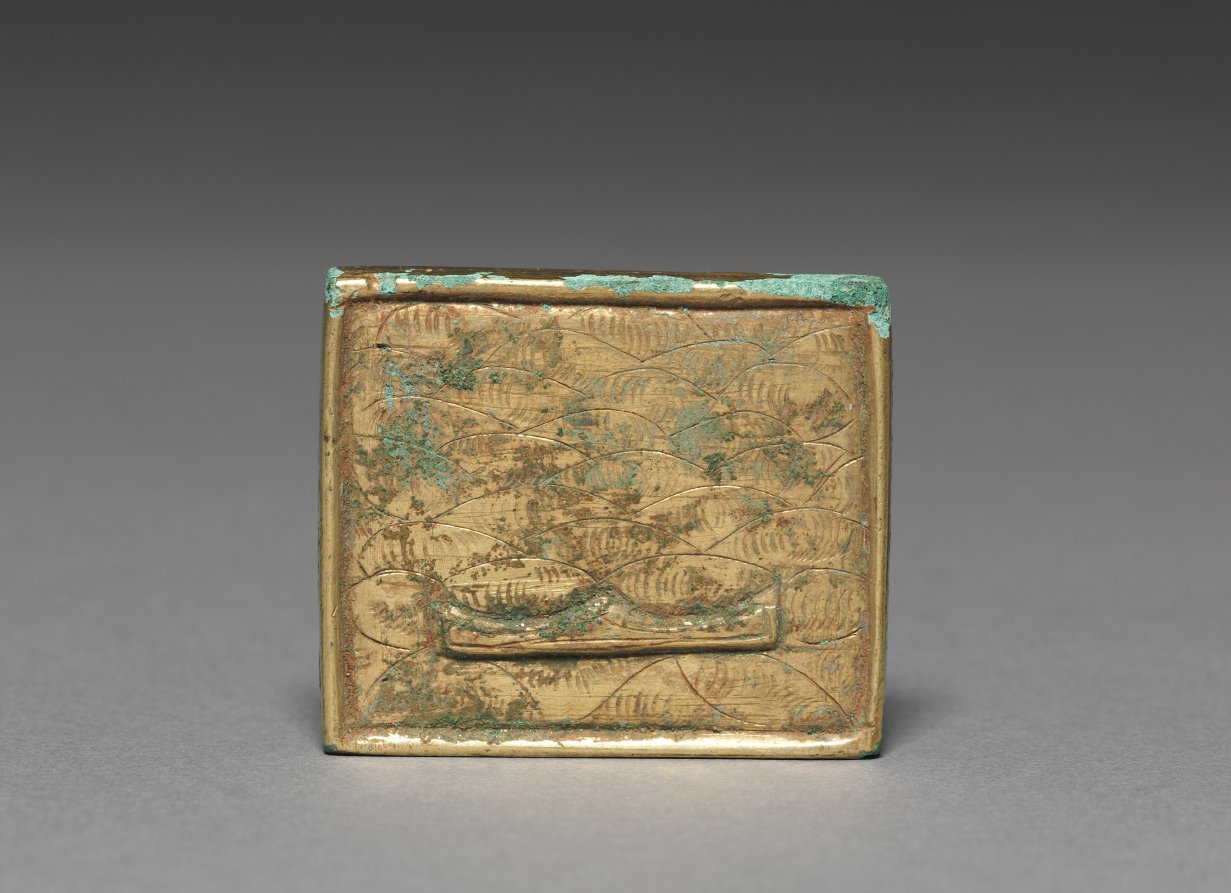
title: Belt Ornament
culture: Korea, Goryeo dynasty (918–1392)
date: 918–1392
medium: bronze gilt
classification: Metalwork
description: Metallurgy advanced remarkably in the Goryeo period (918-1392), explaining why a large quantity of sophisticated metal artifacts with delicate designs were used not only as daily accessories but also as burial goods. Belt ornaments like this example were fixed to leather belts.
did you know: The Japanese antique dealer Yamanaka & Company, which opened its branches in New York (1895) and Boston (1899) sold small Korean archaeological materials such as this belt ornament to American collectors in the early 20th century.